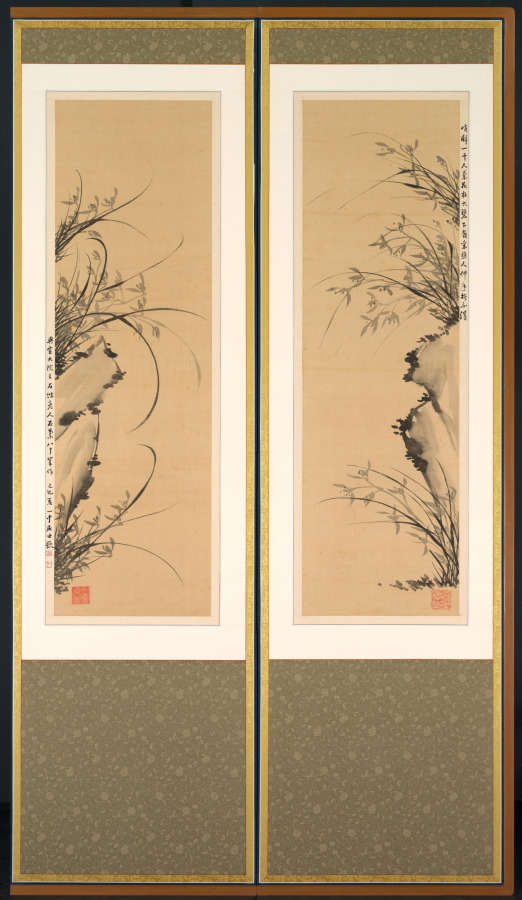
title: Orchids and Rocks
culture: Korea, Joseon dynasty (1392–1910)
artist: Yi Ha-eung (Korean, 1820–1898)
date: 1897–98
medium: Eight-panel folding screen; ink on silk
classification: Painting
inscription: Translation: [I] painted for the high minister Yangwon. [I] humbly request your corrections and advice [on my painting]. [By] an eighty-year old gentleman of rocks.)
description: Yi Ha-eung (1820−1898), the artist of this eight-panel folding screen, was one of the most influential men in late 19th-century Korea. Acting as the regent for his son, King Gojong (1852−1919), who ascended the throne at the age of thirteen, Yi ruled Korea from 1866 to 1873. In addition to his illustrious political career, Yi was also recognized as one of the most celebrated artists who led the revival of literati art in late 19th-century Korean art. In particular, he was recognized as the master of orchids, one of the “Four Gentlemen” (plum, orchid, chrysanthemum, and bamboo) themes. Solely relying on monochrome ink, Yi depicted the curvilinear silhouettes of cymbidium orchid leaves dramatically hanging down from cliffs. Growing in wilderness and redolent with fragrance, orchids were often associated with the perseverance of principled gentlemen, and thus became one of the most popular subjects of scholar-artists' paintings.On the upper right corner of the far left panel, Yi wrote a short inscription stating that he painted the work at the age of 80.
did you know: The artist of this elegant painting is the formidable politician Yi Ha-eung (1820–1898), who is known for a seclusion policy that aimed to protect Korea and its sovereignty from foreign influences.